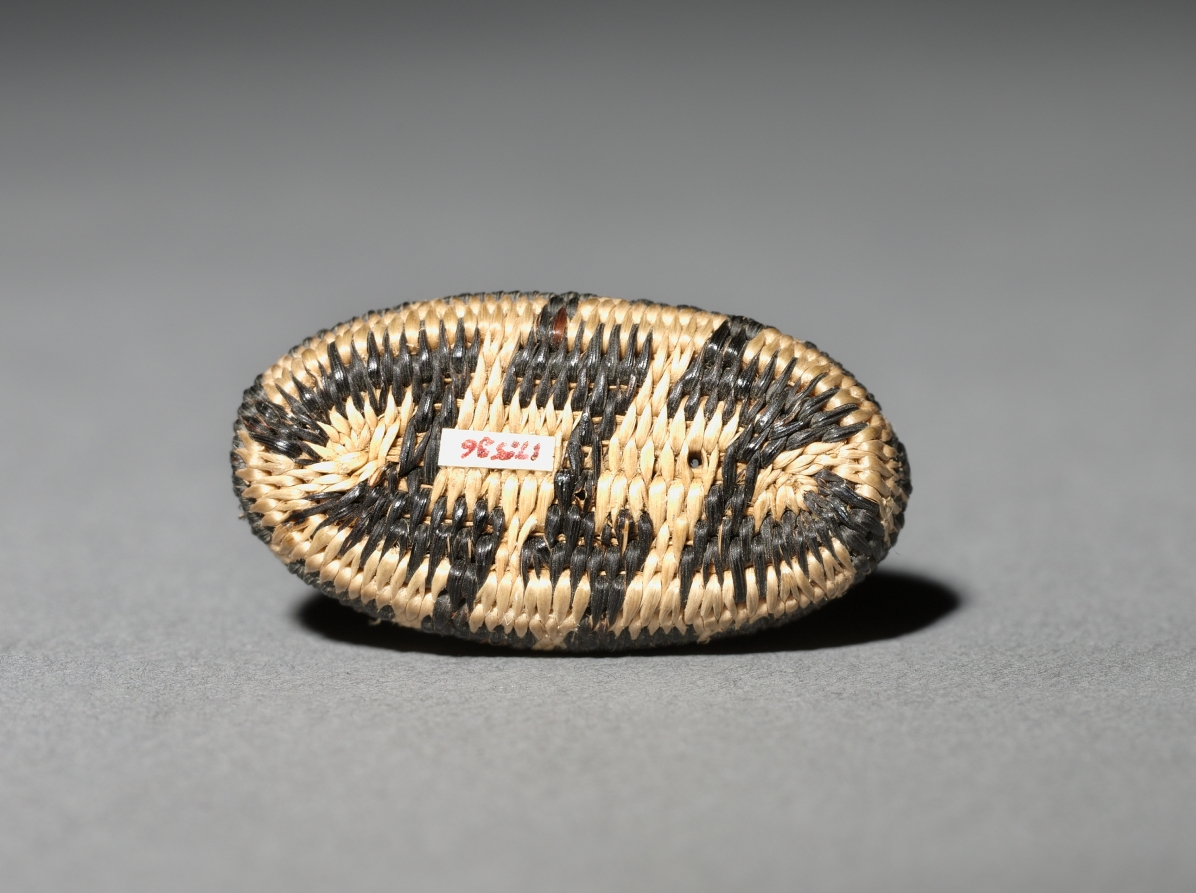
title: Miniature Rhomboidal Basket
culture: California, Pomo, late 19th-early 20th century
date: late 1800s-early 1900s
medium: plant materials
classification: Basketry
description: Miniature baskets were made to demonstrate the basket-maker’s virtuoso skill, and these tiny marvels seem to be no exception—the smallest are just a few millimeters wide but still patterned. For such fine work, dexterity was required as much for preparation of materials as for weaving.